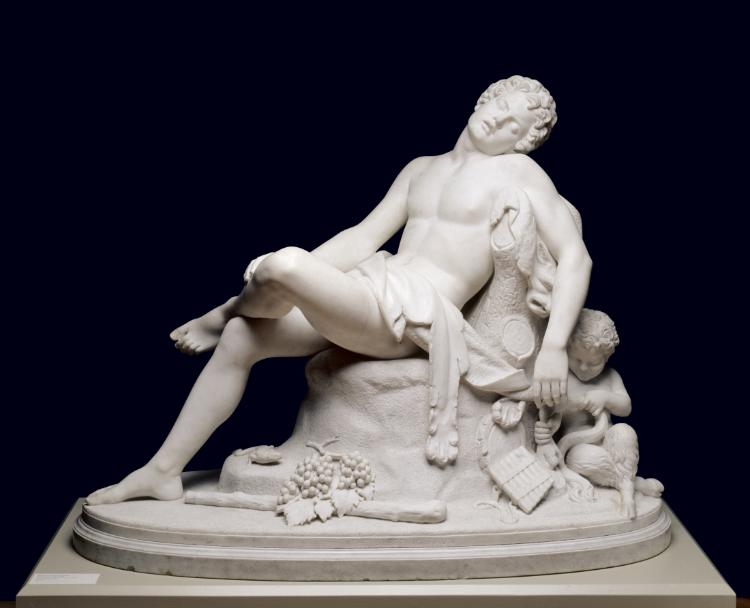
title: The Sleeping Faun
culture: America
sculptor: Harriet Goodhue Hosmer (American, 1830–1908)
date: modeled 1864, carved c. 1870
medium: marble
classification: Sculpture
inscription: Signed and inscribed on base: "H HOSMER Fecit -- Romae"; titled on base: "THE SLEEPING FAUN"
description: Hosmer is the best known female member of a large group of American artists working in Italy during the mid-1800s. The Sleeping Faun, a depiction of a pointed-eared woodland spirit, demonstrates her mastery of the neoclassical style, which was inspired by the art of ancient Greece and Rome. Hosmer’s playful sense of humor infuses the composition: a half-human, half-goat satyr mischievously ties the unwitting faun’s animal skin garment to a tree stump.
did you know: Hosmer said, "I honor every woman who has strength enough to step out of the beaten path. . . ."